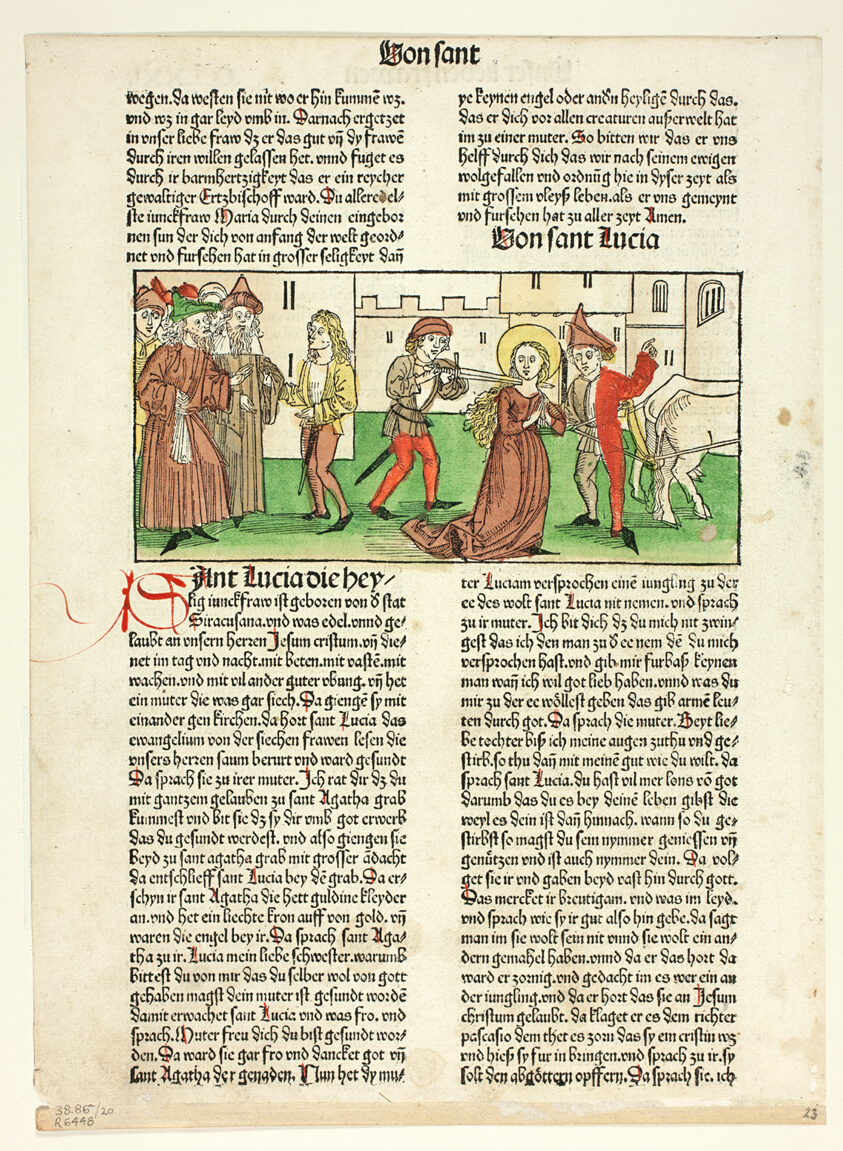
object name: Print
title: The Martyrdom of Saint Lucy from Heiligenleben, Sommerteil (Lives of the Saints, Summertime), Plate 20 from Woodcuts from Books of the 15th Century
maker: Unknown Artist (Nuremberg, 15th century); printed and published by Anton Koberger (German, c. 1440/45–1513); original text by Jacobus de Voragine (Italian, c. 1230–1298); portfolio text by Wilhelm Ludwig Schreiber (German, 1855–1932)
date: 1488, portfolio assembled 1929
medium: Woodcut in black with hand-colored additions, and letterpress in black with rubrication, (recto and verso), on cream laid paper, tipped onto cream wove paper mat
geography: Germany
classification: woodcut; print; prints and drawing